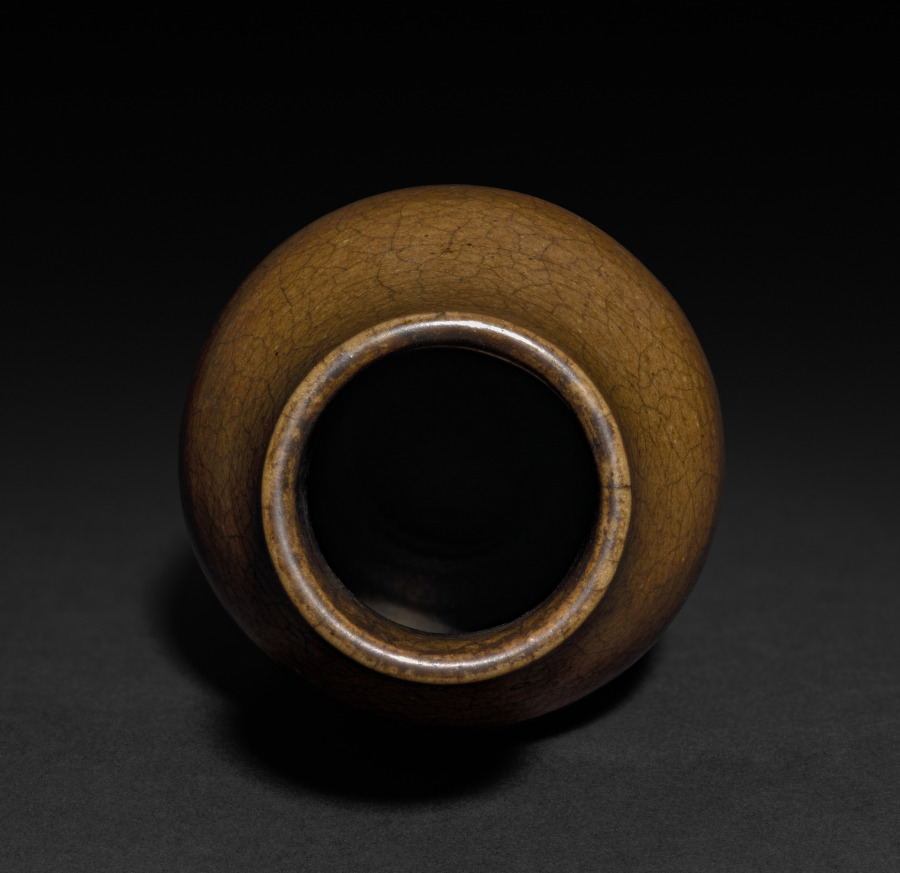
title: Vase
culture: China, Qing dynasty (1644-1911), Kangxi reign (1661-1722)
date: 1662–1722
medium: porcelain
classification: Ceramic